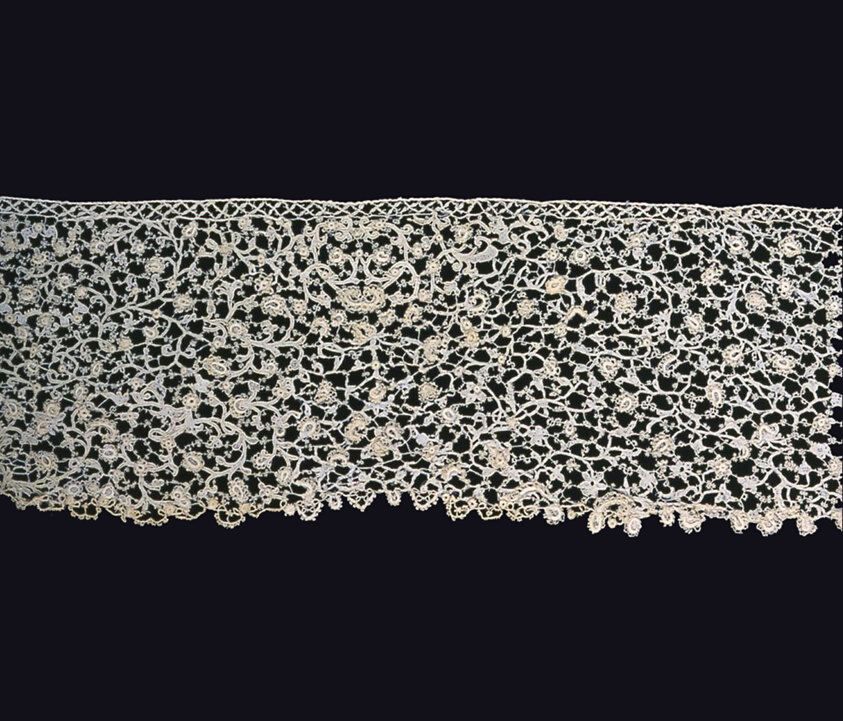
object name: Textile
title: Flounce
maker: Italy, Venice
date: 1675/1700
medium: Linen, raised needle lace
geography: Italy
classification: textile; lace - needle